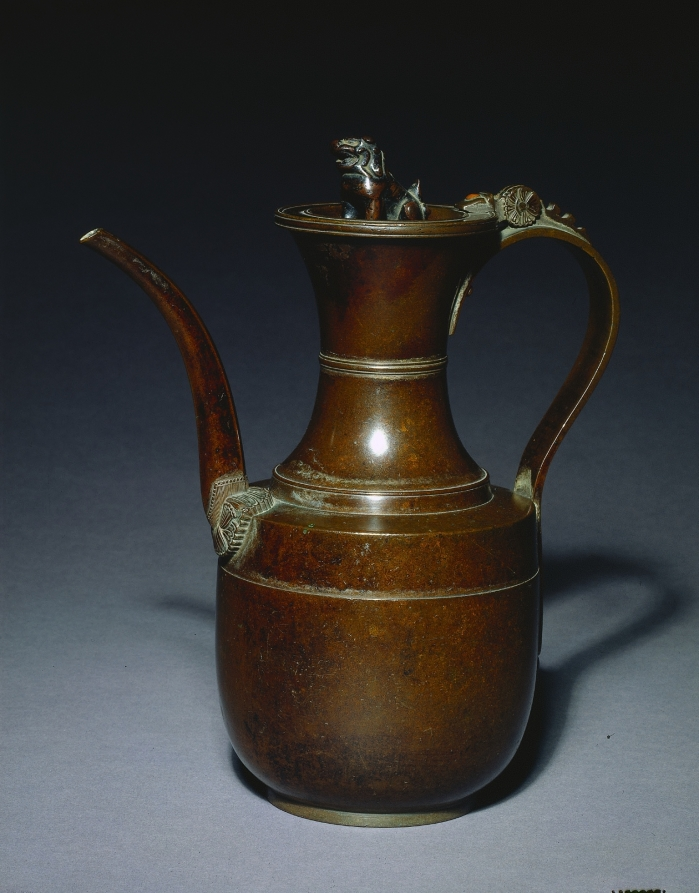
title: Ewer (Shigigata Suibyō)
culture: Japan, Kamakura period (1185–1333)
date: 1185–1333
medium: bronze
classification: Metalwork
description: Ewers such as this one are known as Shigi-shaped for their association with the temple Chōgosonshiji located near Mount Shigi west of the city of Nara. It once contained water for use in ceremonies conducted before Buddhist deities. Known as kundika in Sanskrit, water vessels were originally one of 18 items monks needed to have to perform their daily duties.